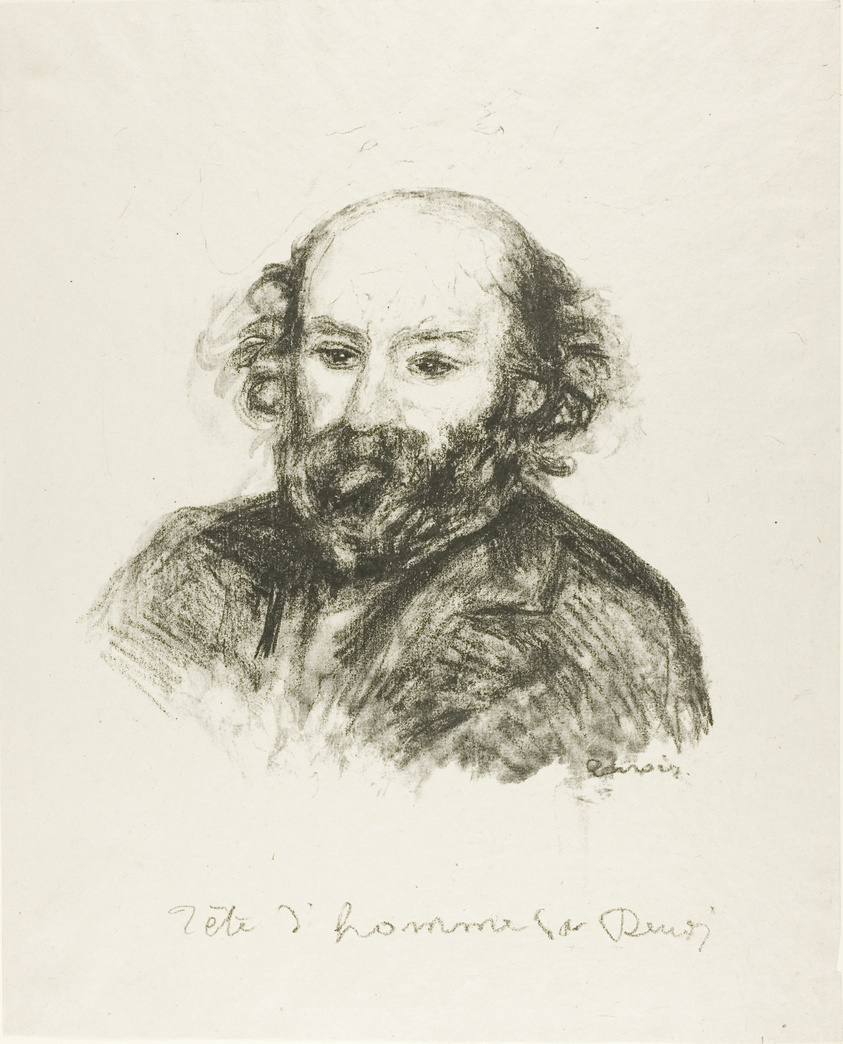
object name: Print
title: Portrait of Cezanne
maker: Pierre Auguste Renoir; French, 1841-1919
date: c. 1902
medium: Lithograph on grayish ivory wove paper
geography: France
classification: lithograph; print; prints and drawing